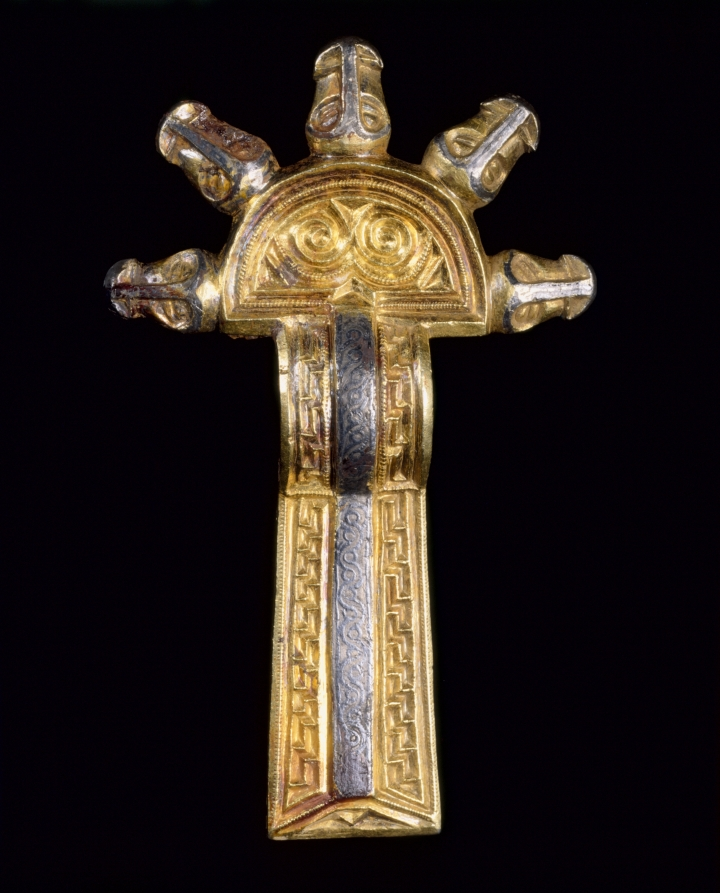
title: Fibulae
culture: Alemannic, Migration Period, 6th-7th century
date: 500s-600s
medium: cast silver, parcel-gilt, with niello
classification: Jewelry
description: A woman of high rank might have worn these twin fibulae on her shoulders, one fastening her inner garment on the right, the other her outer garment on the left. She might also have suspended them from her belt as decorative ornaments